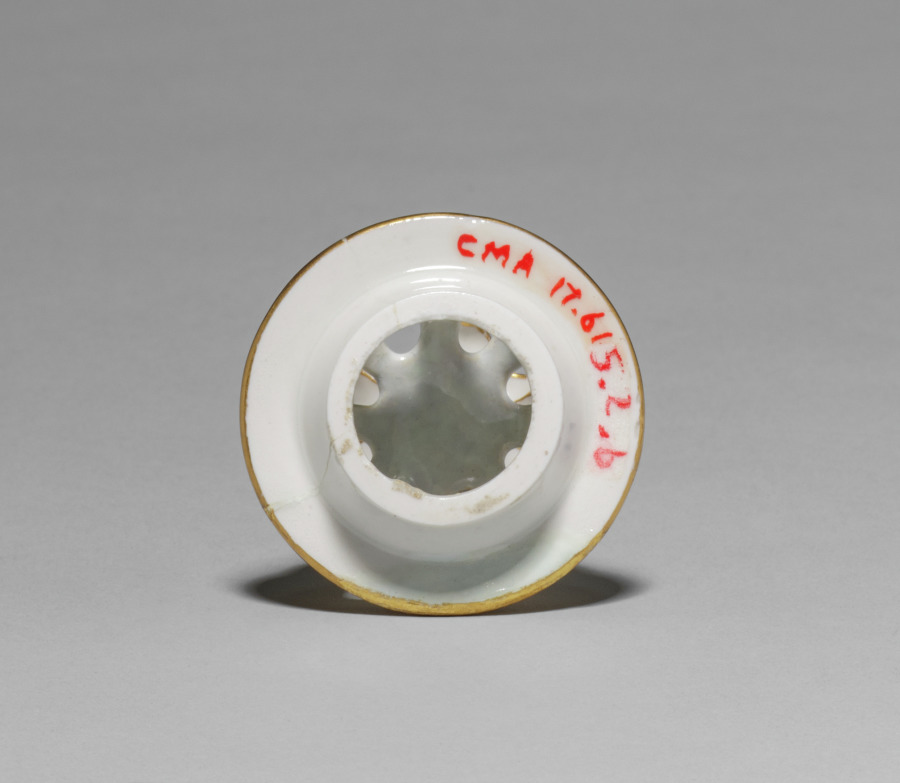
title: Urn (cover)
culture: England, Worcester, 19th century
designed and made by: Flight, Barr and Barr (British)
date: c. 1815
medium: artificial porcelain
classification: Ceramic